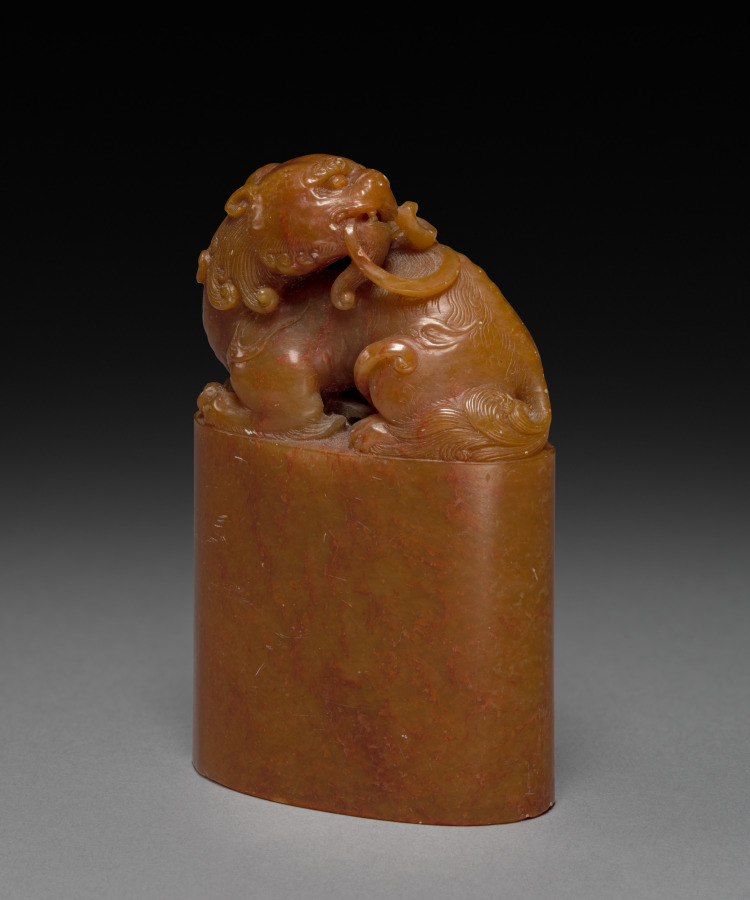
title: Seal with Reclining Qilin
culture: China, Qing dynasty (1644–1911), Qianlong reign (1736–95)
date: 1736–95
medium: tianhuang stone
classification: Stone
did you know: The elliptical seal has three characters in archaic script enclosed by two dragons.